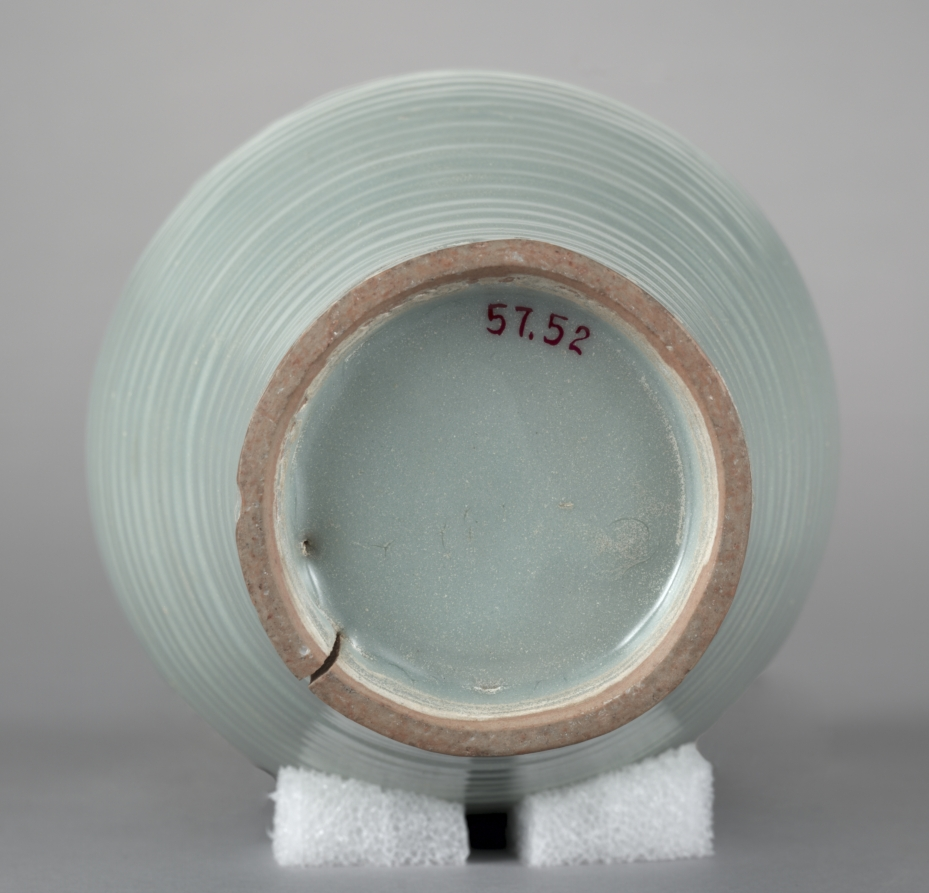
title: Vase (Meiping)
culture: China, Zhejiang Province, Longquan region, Southern Song dynasty (1127-1279)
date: 1200s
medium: green-glazed porcelaneous stoneware, Longquan ware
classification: Ceramic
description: The Longquan potter applied many coats of glaze and allowed each to dry before adding another. With firing, the glaze matured to a thick and cloudy layer, making the pottery more like an exquisite emulation of jade.